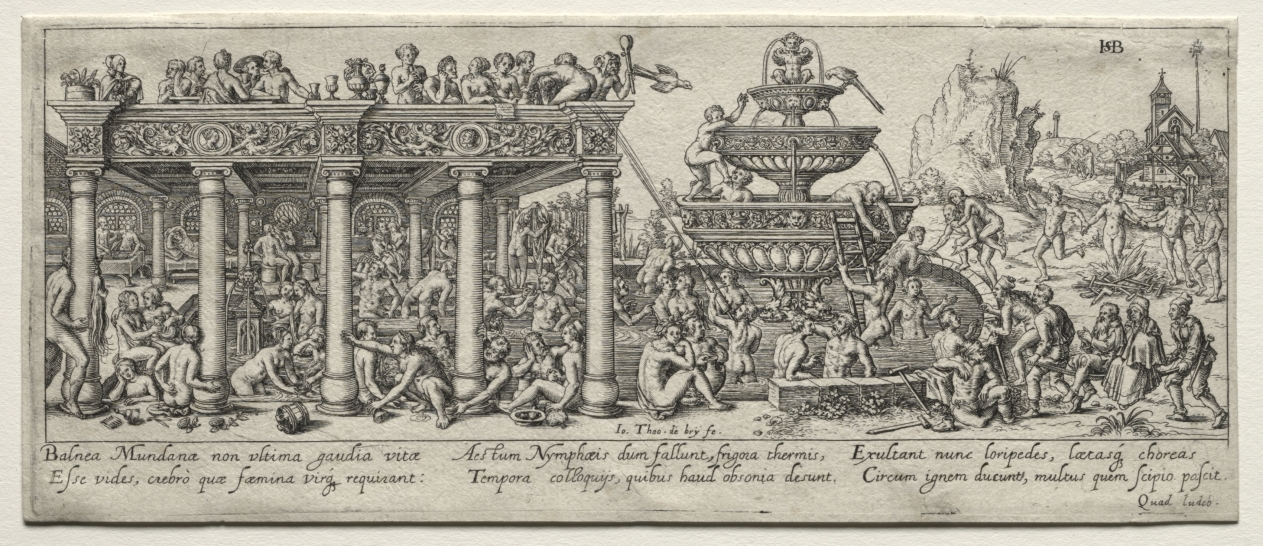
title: The Fountain of Youth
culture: Flanders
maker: Johann Theodor de Bry (German, 1561–1623)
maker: after Hans Sebald Beham (German, 1500–1550)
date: 1588–1623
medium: etching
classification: Print